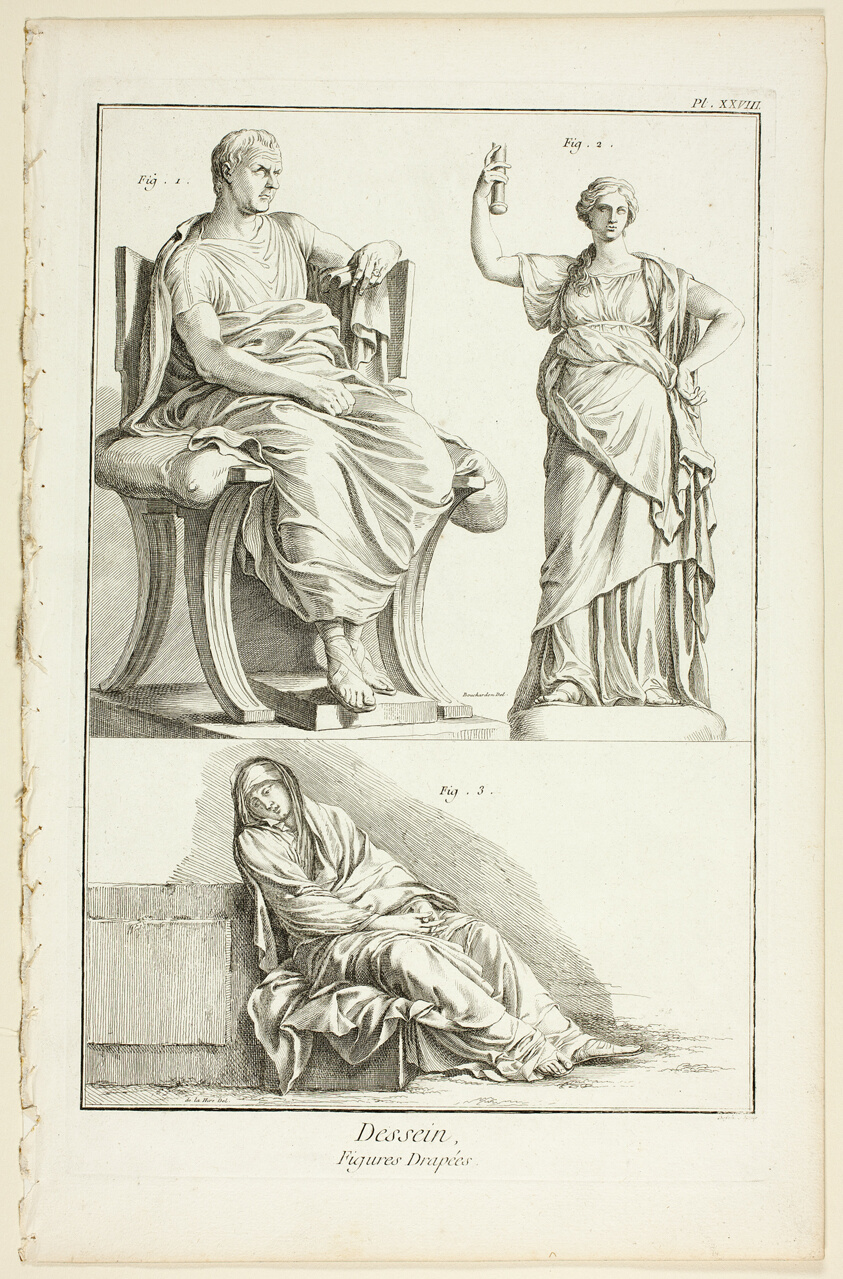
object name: Print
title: Design: Draped Figures, from Encyclopédie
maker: A. J. Defehrt (French, active 18th century); after de la Hire (French, active 18th century); published by André le Breton (French, 1708-1779), Michel-Antoine David (French, c. 1707-1769), Laurent Durand (French, 1712-1763), and Antoine-Claude Briasson (French, 1700-1775)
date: 1762/77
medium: Etching, with engraving, on cream laid paper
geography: France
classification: etching; print; prints and drawing